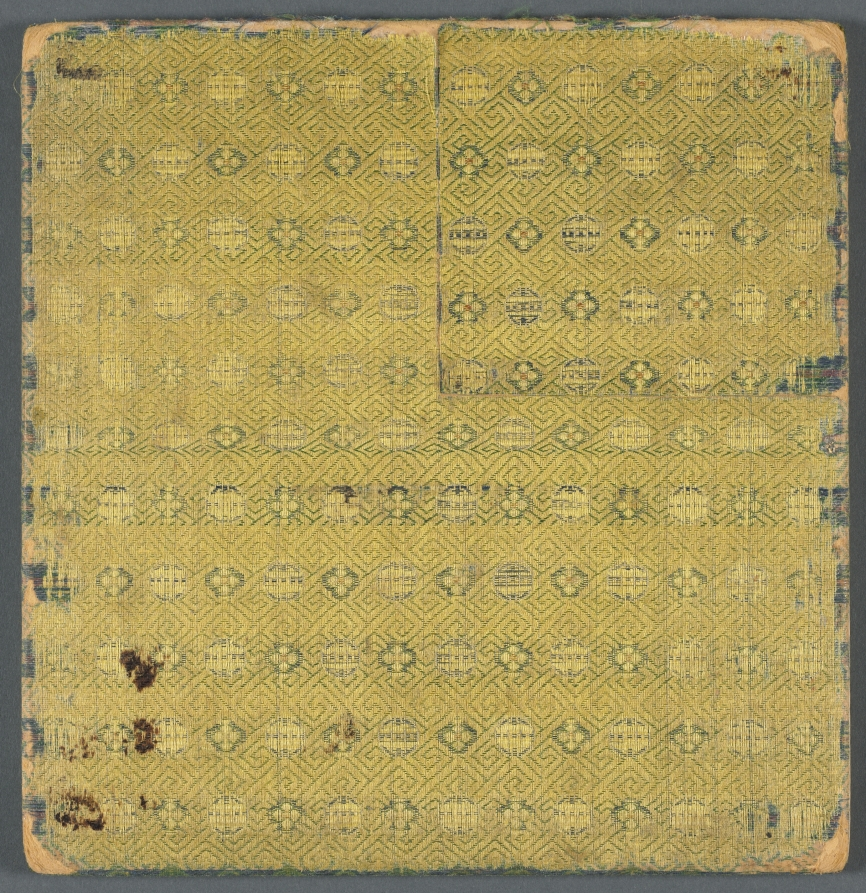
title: Album of Miscellaneous Subjects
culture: China, Qing dynasty (1644-1911)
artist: Fan Qi (Chinese, 1616–after 1694)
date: early 1650s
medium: album of ten leaves; ink and light color on silk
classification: Painting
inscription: 10 poems, 1 colophon, and 29 additional seals: 1 poem and 3 seals of Wang Wu 王武 (1632–1690); 2 poems and 6 seals of Han Tan 韓菼 (1637–1704); 2 poems and 6 seals of Xu Fang 徐枋 (1622–1694); 4 poems and 10 seals of Zhou Yi 周儀 (mid 17th century–about 1705); 1 poem and 3 seals of Li Bing 李炳 (17th century); 1 colophon and 1 seal of Tomioka Tessai 富岡鐵齋 (1836-1924).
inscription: Leaf 1. Poem by Wang Wu 王武 (1632–1690) A narrow path coiling, winds across rock foundations;/ Old vines and ancient trees meet the sunset's slanting rays./ Unaware that my small boat has gone so far,/ By the time it reverses its oars, the green mountains will be half-covered with clouds.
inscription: Leaf 2. Poem by Han Tan 韓菼 (1637–1704) A thousand feet of red cliffs look like a sculptured flower of Fu-yung;/ In one glance, the long bridge joins adjacent ridges./ Furthermore a wine shop stands in a bamboo grove;/ The fellow who bought some good wine is drunk on the eastern shore of the stream.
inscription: Leaf 3. Poem by Xu Fang 徐枋 (1622–1694) Green are the reeds, the sun not yet set;/ Tree foliage and mountain colors divide the lake in two halves./ A solitary recluse sits upon a flat bluff,/ Occasionally observing white clouds rising from the mountain tops.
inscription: Leaf 4. Poem by Xu Fang 徐枋 (1622–1694) By chance, I start my journey from the watershed to remote regions,/ Suddenly I sight the silhouette of mountains - myriad expanses of green./ What is this "Come-flying" Peak which now does not recede,/ Its rocky walls, linked to heaven, are drenched by a waterfall.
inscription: Leaf 5. Poem by Zhou Yi 周儀 (mid 17th century–about 1705) That stone path surrounded by streams - for whom was it created?/ Leaning on my staff, I walk and hum, arriving alone./ As soon as I ascend to gaze at these mountains, my happiness increases,/ Every morning the moistening dew makes slippery the green moss.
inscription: Leaf 6. Poem by Zhou Yi 周儀 (mid 17th century–about 1705) The bright moon emerges through the willow,/ The fragrance of flowers is already difficult to retain./ Listening above these tall branches,/ I sense that faraway in my native place autumn has arrived./ Obstructed, all the diminished waters flow,/ Abruptly the sound of a lute wafts to and fro./ A strong wind, unabated, blows among, the willow branches.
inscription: Leaf 7. Poem by Han Tan 韓菼 (1637–1704) Thoughts of autumn in the nuptial chamber with the new chill arising,/ The white frost all pervasive with a bright moon shining./ Outside the window, a crisp wind conveys the sound of crickets./ Within this quiet dream, I seem to sense the fragrance of orchids.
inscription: Leaf 8. Poem by Li Bing 李炳 (17th century) Maple leaves drift in the wind, the autumn gusts bracing,/ Hibiscus flowers steeped with water, the evening breeze light./ The moonlight's slanting beams shine upon dreaming lovers./ No wonder that pair of fowl should dream of the absent partners.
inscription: Leaf 9. Poem by Zhou Yi 周儀 (mid 17th century–about 1705) Ancient trees share the slanting rays of the setting sun/ Chilly ravens hover round their branches/ The leader of the flock thinks this is a good place to rest,/ Evening being the time for returning./ This flock is the so-called a filial crow,/ Who, in disgorging their food [to feed their young], have compassionate hearts,/ Were the people in the world all like this,/ Fine talent would be everywhere.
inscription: Leaf 10. Poem by Zhou Yi 周儀 (mid 17th century–about 1705) Green bamboo stand alone with a snowy covering,/ In the deep recesses of a secluded valley, the evening breeze is light./ White egrets are lean as shadows with the cold ripples frozen,/ They enter the gorge not just to admire the fish.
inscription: Artist's signature on the tenth painting: Zhongling Fan Qi 鐘陵樊圻 ["Fan Qi of Zhongling" (Zhongling is another name for Nanjing.)] Artist's ten seals, one on each painting: Fan Qi 樊圻.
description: Half of this album depicts landscapes; the other half depicts insects, birds, and natural subjects. Emanating peace and tranquility, Fan Qi’s landscapes reveal a quiescent vision and luminescence that lends an otherworldliness to his images. His insects and birds show his attention to minutiae and technical facility in the control of the brush.